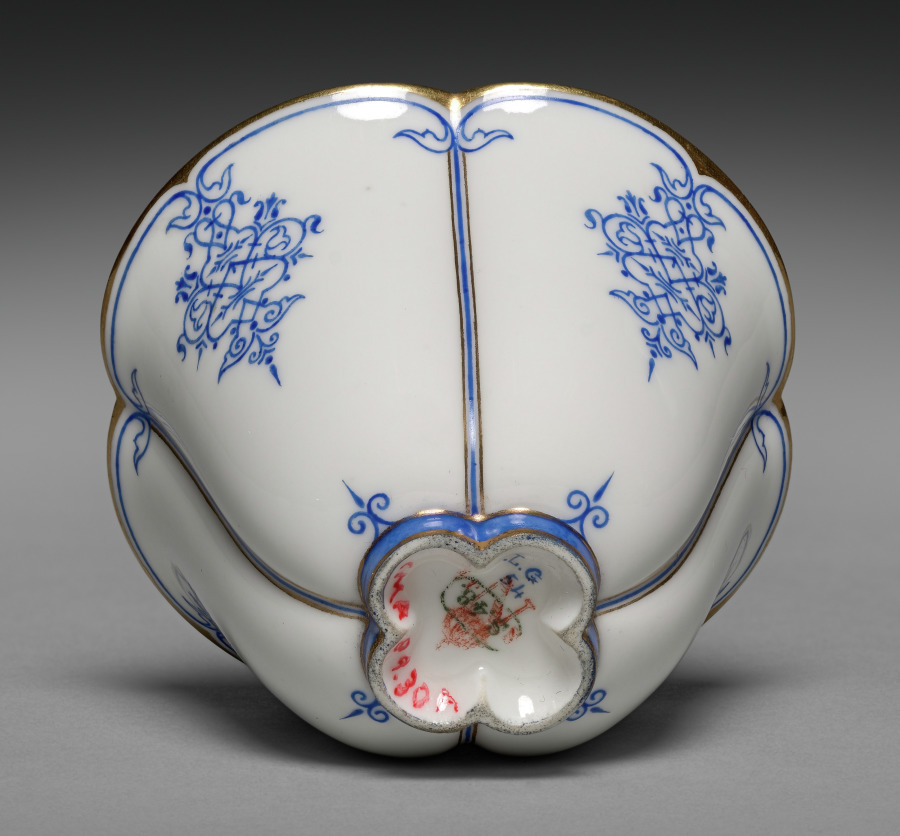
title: Cup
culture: France, Sèvres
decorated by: Guyonnet (French)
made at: Sèvres Porcelain Factory (French, est. 1756)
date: c. 1848–55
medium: hard-paste porcelain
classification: Ceramic